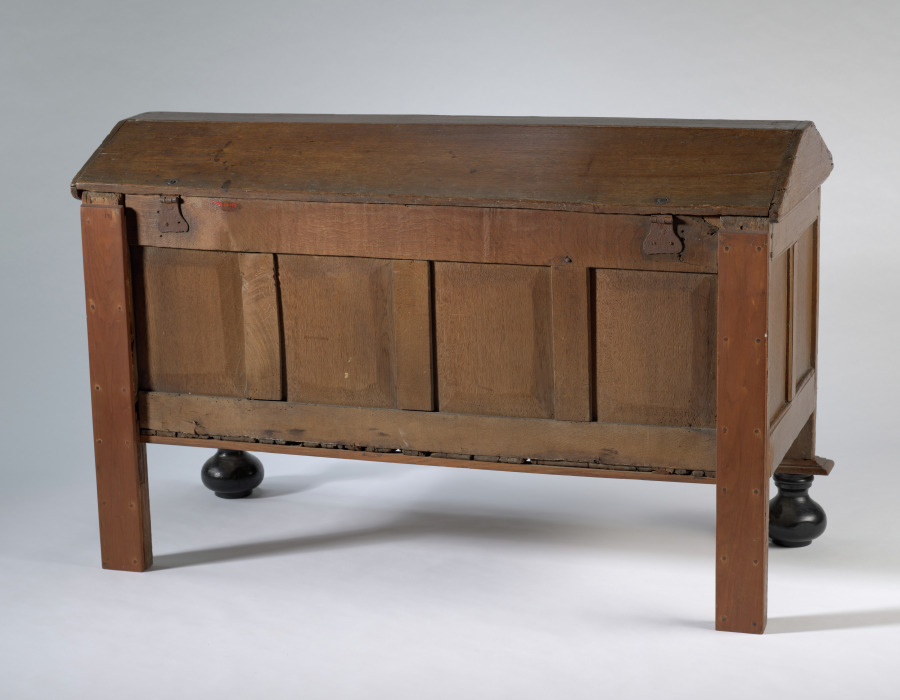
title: Chest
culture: Netherlands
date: 1600s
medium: oak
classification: Furniture and woodwork